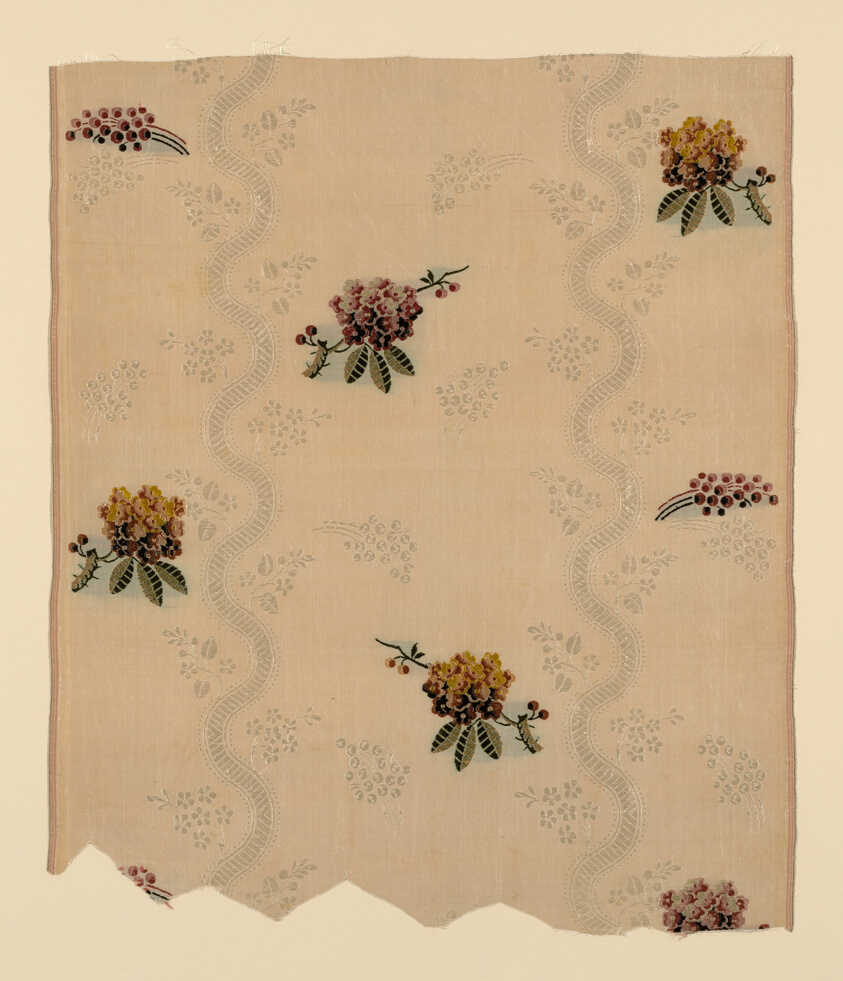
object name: Textile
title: Panel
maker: England, Spitalfields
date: c. 1752/55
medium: Silk, plain weave with supplementary patterning wefts and supplementary brocading wefts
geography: Spitalfields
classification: textile; weaving